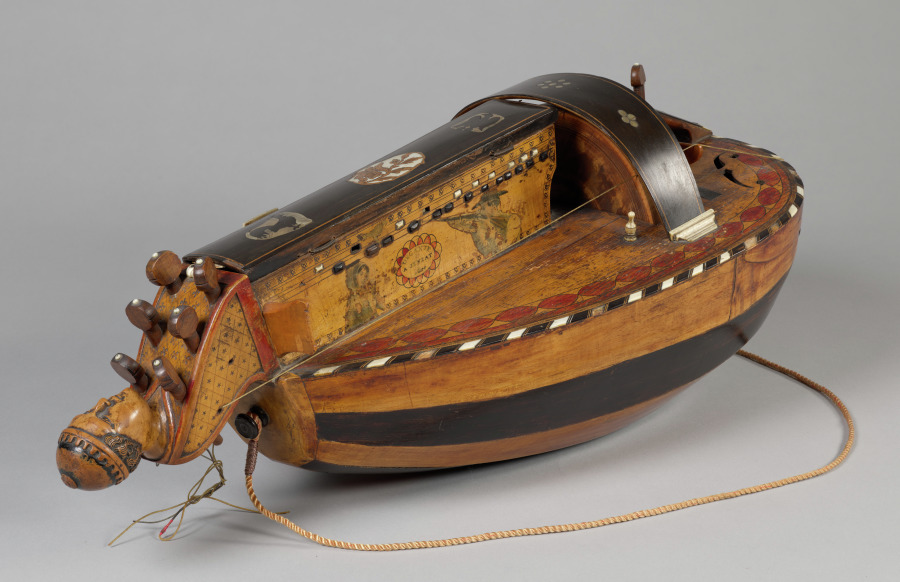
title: Vielle à Roue (Hurdy-Gurdy)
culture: France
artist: Jacques Decante (French, 1808–1884)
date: 1865–70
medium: Wood; mother-of-pearl inlay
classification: Musical Instrument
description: In France, the hurdy-gurdy is known as the vielle à roue (wheel fiddle). This six-stringed musical instrument produces sound by a hand crank-turned wheel that rubs against the strings. The wheel functions much like a violin bow, and single notes sound similar to those of a violin. Melodies are played on a keyboard that presses small wedges against the strings to change their pitch.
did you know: This vielle à roue was made in the French village of Jenzat, which was the manufacturing center for hurdy-gurdies during the 19th century.